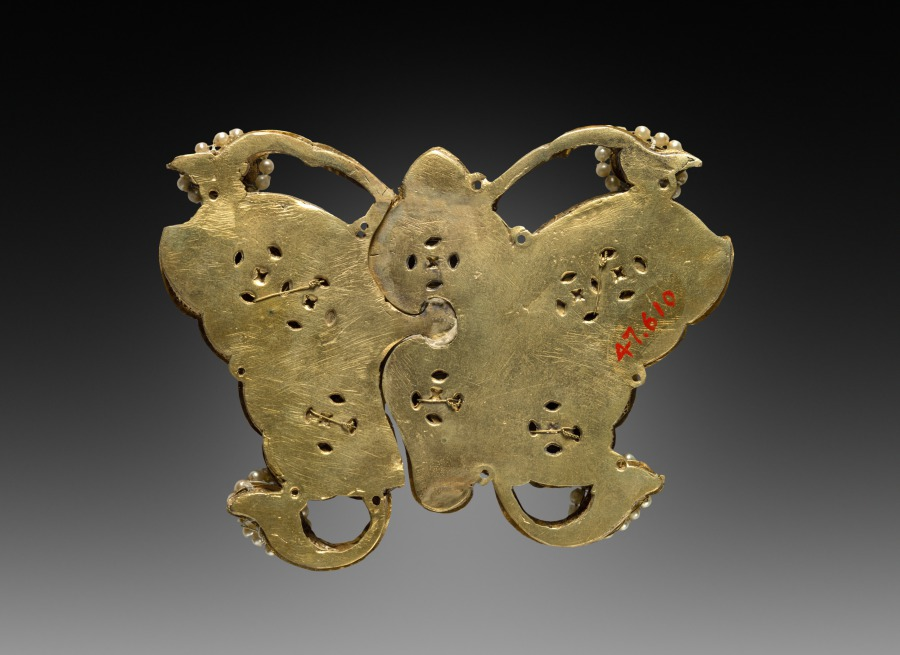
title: Buckle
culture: China, Qing dynasty (1644-1911)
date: 1900s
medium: Gilt-silver inlaid with semiprecious stones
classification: Jewelry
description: This buckle has a silver gilt base with kingfisher feather inlay work and is set with semiprecious stones.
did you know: From the back, you can see that the buckle has two interlocking parts.